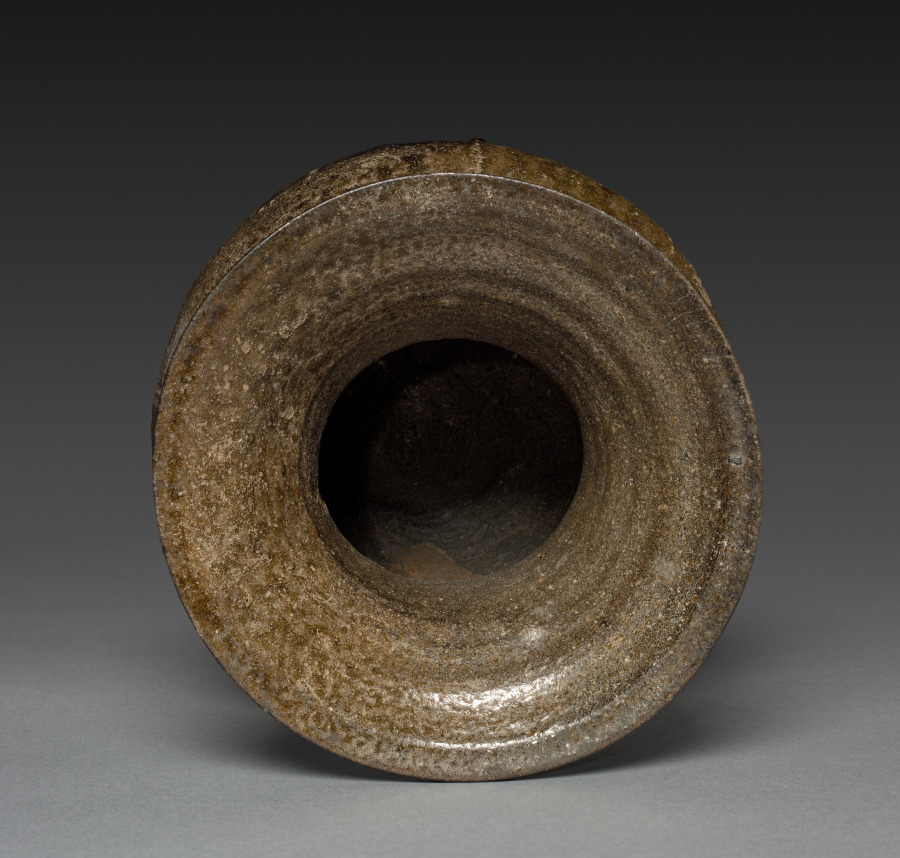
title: Jar with Combed Design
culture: Japan, Kofun period (300–710 CE)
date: 400s–500s CE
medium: stoneware with natural ash glaze, impressed and tooled patterns (Sue ware)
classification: Ceramic